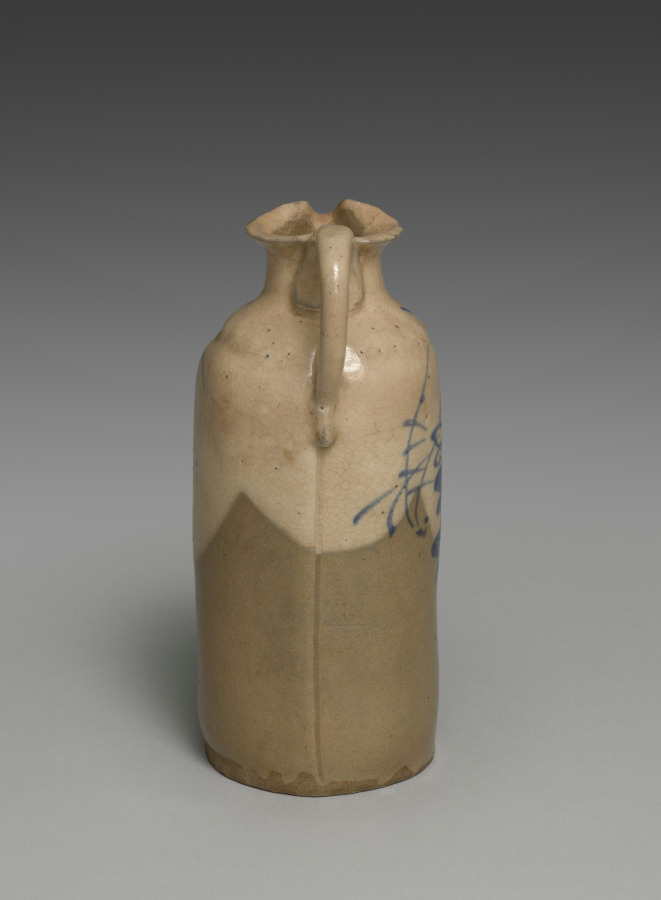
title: Sake Pourer with Bellflowers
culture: Japan, Edo period (1615–1868)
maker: attributed to Seifū Yohei I (Japanese, 1801–1861)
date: c. 1844–57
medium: one of a pair of sake flasks; stoneware with white slip, underglaze blue and gold repair (kintsugi) (Kyoto ware)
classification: Ceramic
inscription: The storage box for the pair of vessels is inscribed and impressed with seals.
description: This pair of sake pourers adorned with with bamboo and bellflowers is attributed to the founder of the Seifū Studio, Seifū Yohei I (1801–1861). Yohei I, the lineage founder, was born to the Yasuda family in the city of Kanazawa, which faces the Sea of Japan. His home province of Kaga (in present-day Ishikawa Prefecture) produced its own ceramics, known as Kutani ware, but for his training as a potter, Yohei I chose Kyoto, which produced the more technically advanced porcelain ware. He moved to Kyoto around the 1820s and became apprenticed to Nin’ami Dohachi, a leading potter in the city. He later struck out on his own, and it is likely that his teacher gave him the name Seifu Yohei. His works include many exquisitely painted copies of Chinese porcelain, and he also produced stoneware with overglaze color enamels that emulated works in the style of Ogata Kenzan (1663–1743) at which his teacher excelled.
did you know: Kintsugi is the Japanese art of repairing broken pottery by mending the areas of breakage with urushi lacquer dusted or mixed with powdered gold.